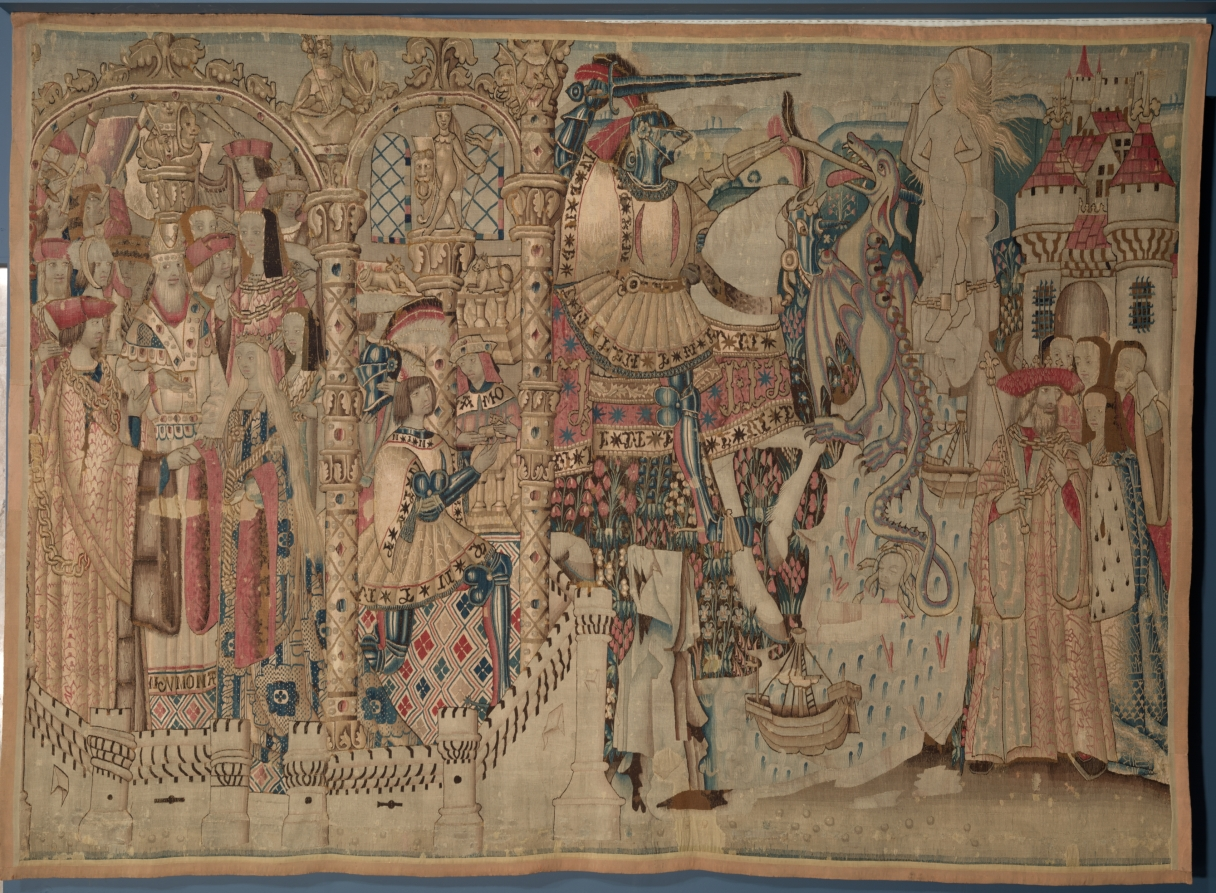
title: Story of Perseus and Andromeda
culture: Netherlands, early 16th century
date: early 1500s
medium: tapestry weave: wool and silk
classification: Tapestry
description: The Greek mythological story of Perseus and Andromeda is represented here as a quest for a maiden, read from right to left in three sections. At the upper right, Andromeda has been chained to a rock by her parents, at the lower right, as a sacrifice to a dragon sent by Poseidon, god of the sea. In the center on a millefleur (floral) ground, Perseus on horseback kills the dreaded dragon. Within the castle at the left, Perseus kneels before an altar, and at the far left, he marries Andromeda.